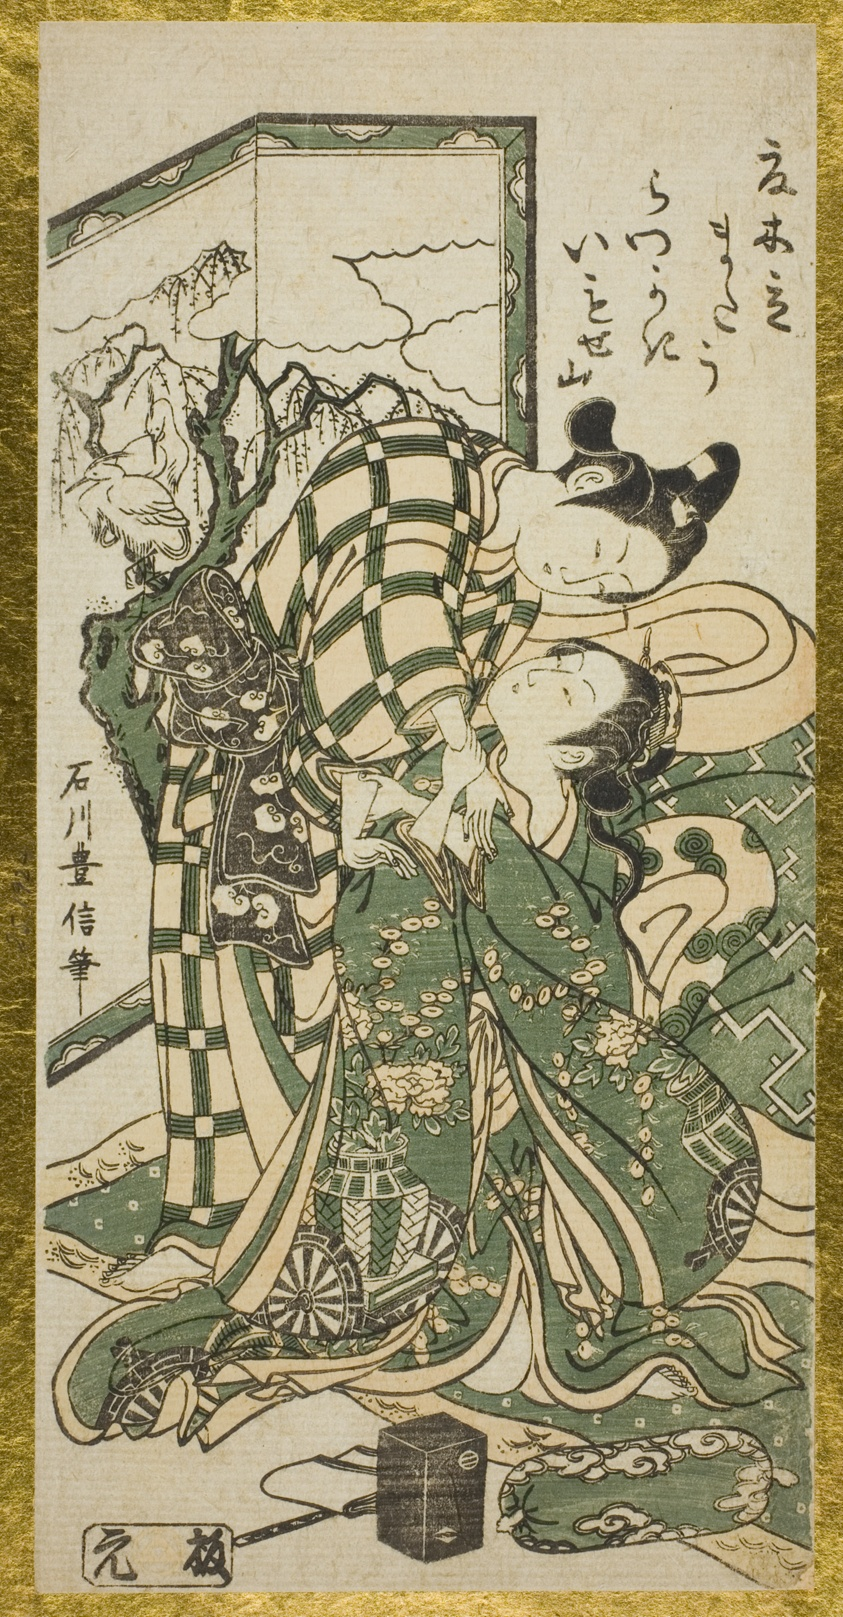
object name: Print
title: Young Couple in Front of a Screen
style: Japanese (culture or style)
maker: Ishikawa Toyonobu (Japanese, 1711-1785)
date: c. 1748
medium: Color woodblock print; hosoban, benizuri-e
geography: Japan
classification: woodblock print; print; asian art